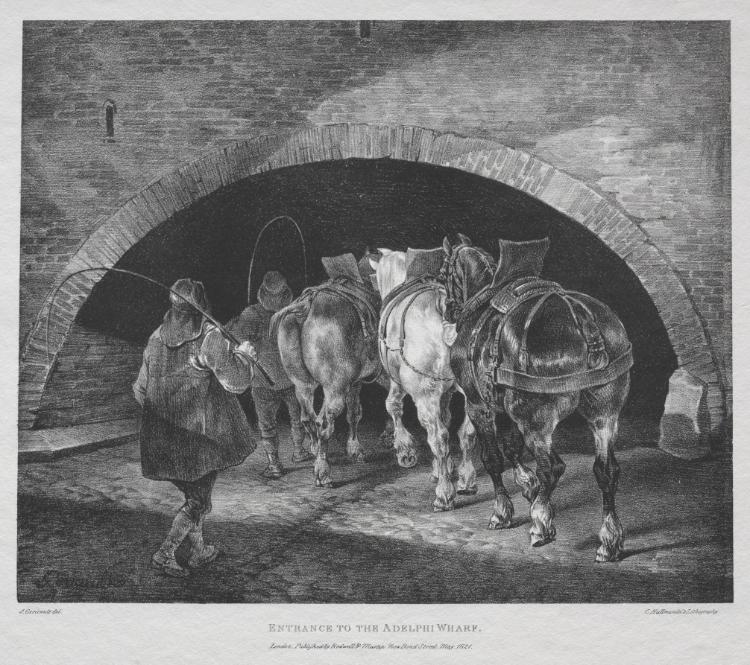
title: Various Subjects Drawn from Life and on Stone: Entrance to Adelphi Wharf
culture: France, 19th century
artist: Théodore Géricault (French, 1791–1824)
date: 1821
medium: lithograph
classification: Print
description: Gericault produced a wonderful set of lithographs on a visit to London in 1820–21. Entrance to Adelphi Wharf exploits the inherent ability of lithography to produce opaque blacks and an unlimited range of grays.